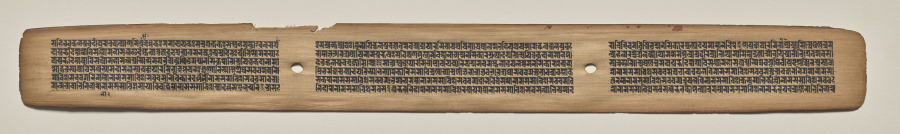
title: Text, folio 173 (recto), from a Manuscript of the Perfection of Wisdom in Eight Thousand Lines (Ashtasahasrika Prajnaparamita-sutra)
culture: Eastern India, Bihar, Vikramashila Monastery. Painting: Nepal, Kathmandu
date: Sunday, September 14, 1119 (year 239 of the Newar Samvat in the month of Ashvina)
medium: gum tempera and ink on palm leaves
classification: Painting